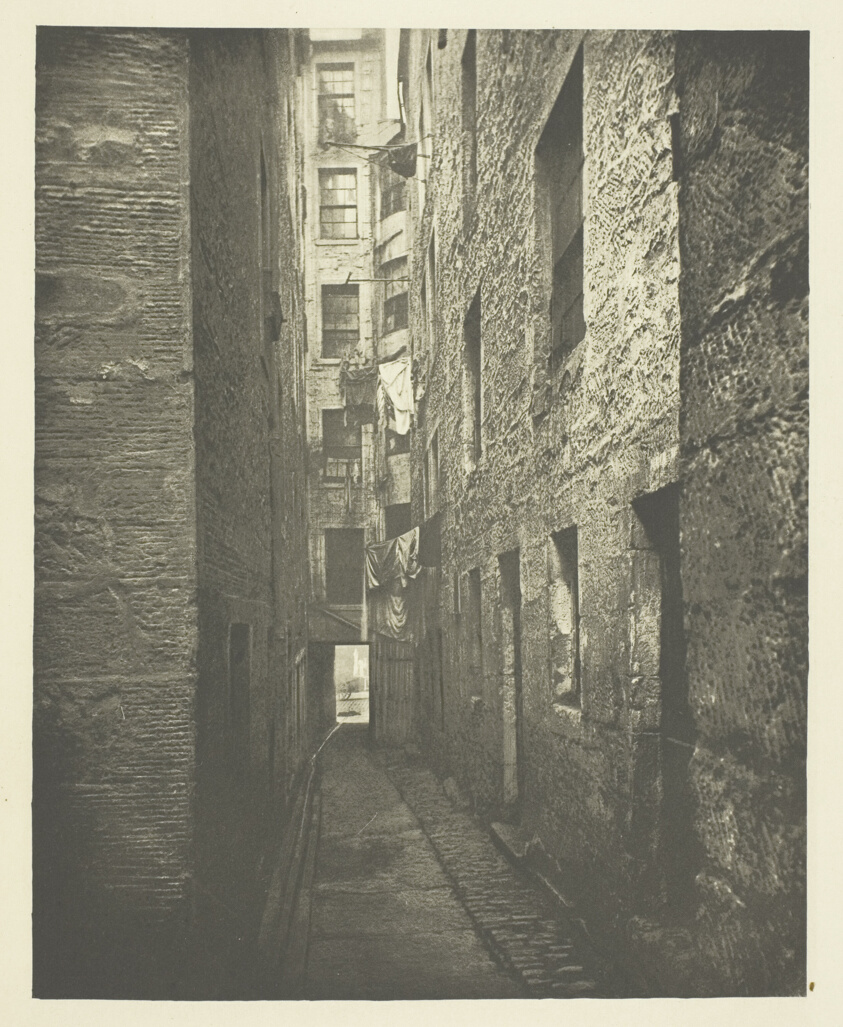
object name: Photograph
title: Close No. 148 High Street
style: 19th century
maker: Thomas Annan (Scottish, 1829–1887)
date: 1868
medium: Photogravure, plate 5 from the book "The Old Closes & Streets of Glasgow" (1900)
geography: Scotland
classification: photograph; photography